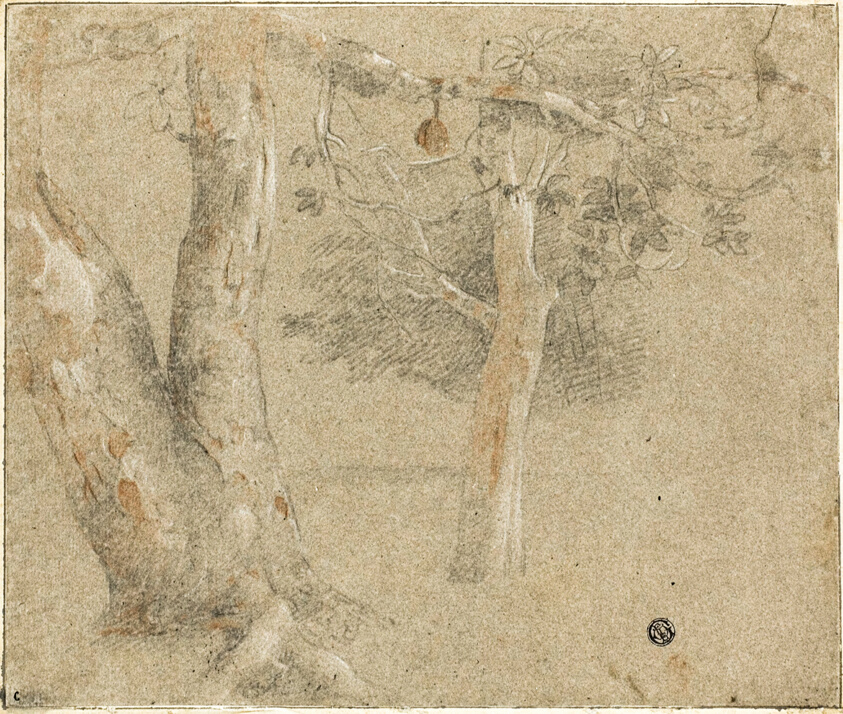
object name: Drawing and Watercolor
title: Sketches of Trees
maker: Attributed to Cristofano Allori; Italian, 1577-1621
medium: Red and black and white chalk on brown laid paper, laid down on ivory laid paper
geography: Italy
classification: graphite; drawings (visual works); prints and drawing